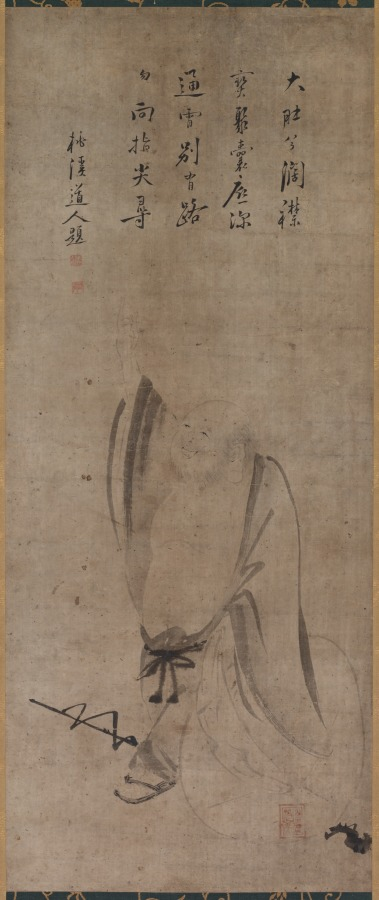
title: Hotei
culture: Japan, Muromachi period (1392–1573)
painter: Yamada Dōan I (Juntei) (Japanese, d. 1573)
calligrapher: Tōkei Jakurin (Japanese, dates unknown)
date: mid-1500s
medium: hanging scroll; ink on paper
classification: Painting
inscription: 桃渓道人 題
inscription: 大肚兮濶襟 寶聚嚢底沵 通霄別有路 勿向指尖尋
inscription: 落款 桃渓之印 若霖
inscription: 印章 山田氏道安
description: Hotei is a semilegendary figure who may have lived from the late 800s to the early 900s. He later became prominent in Chan (or Zen, in Japanese) Buddhist literature. He epitomizes the freewheeling figure outside the mainstream monastic system—in which people strive for enlightenment through prescribed methods—who nonetheless attains a high level of spiritual awakening. The inscription warns against seeking enlightenment by conscious effort: Big stomach, gaping garment, Treasures gathered deep in the bottom of his bag, Passing through the sky is another road, Do not seek that to which his fingertip points.